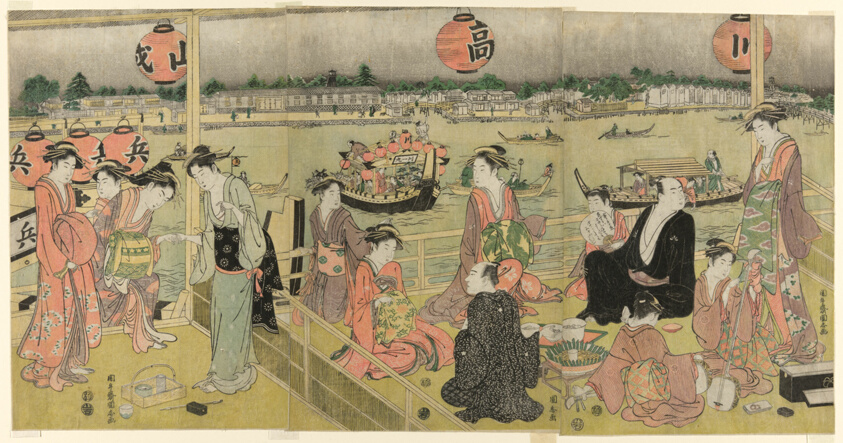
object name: Print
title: A Banquet in a Pleasure House on the Bank of the Okawa (Okawa bata giro jo no yusen)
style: Japanese (culture or style)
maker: Angyusai Enshi; Japanese, active 1785-95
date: c. 1792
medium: Color woodblock prints; oban triptych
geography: Japan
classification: woodblock print; print; asian art